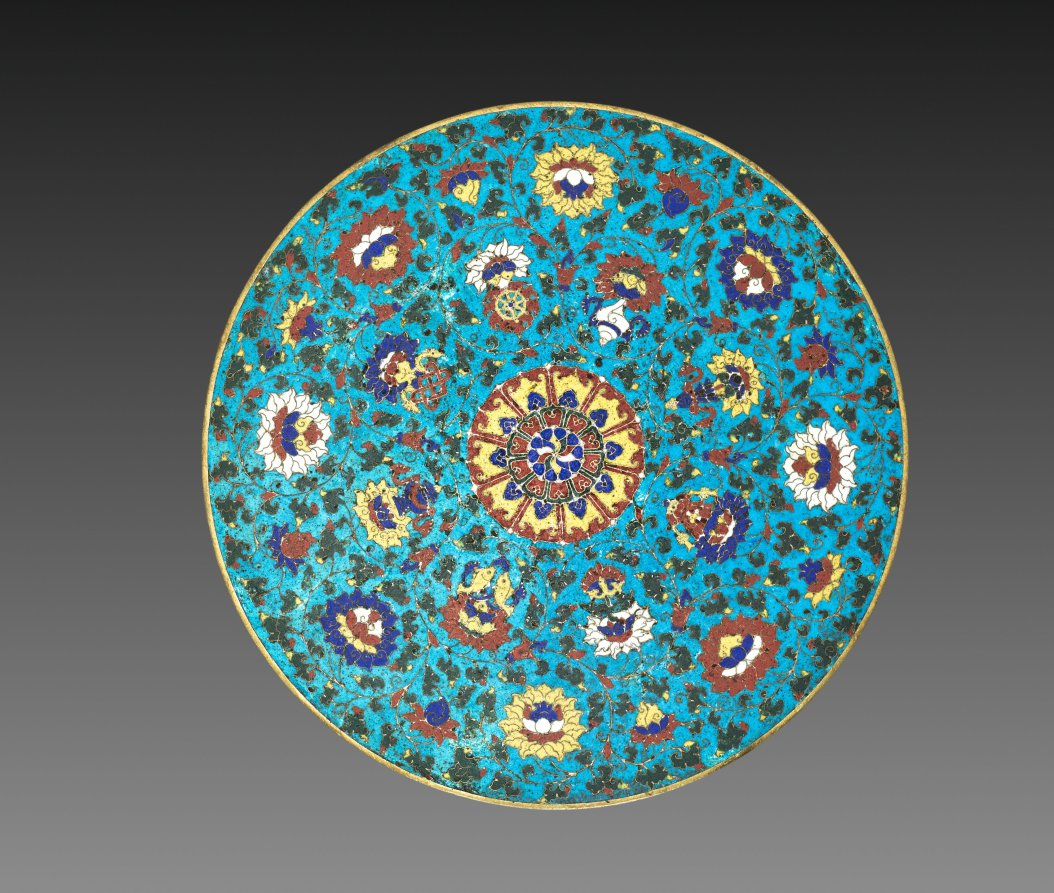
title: Mandala Base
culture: China, Ming dynasty (1368–1644)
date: early 1400s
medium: cloisonné enamel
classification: Enamel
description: A ritual object of Tibetan Buddhism, this cloisonné disc is used as the base for a three-dimensional mandala composed of miniature buildings. The decoration includes the lotus flowers and the Eight Buddhist Treasures: the wheel, the conch, the umbrella, the canopy, the lotus, the paired fish, the vase, and the endless knot.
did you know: In a meditation ritual known as Offering the Universe, the disc functioned as a mandala or cosmic diagram.